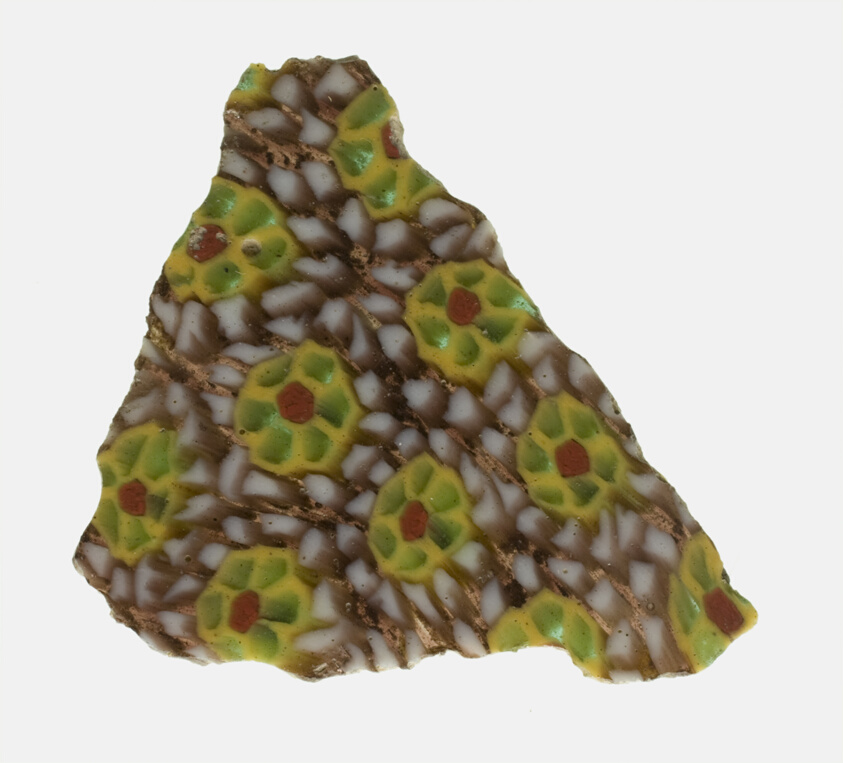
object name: Decorative Arts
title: Bowl Fragment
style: roman (ancient, style or period), ancient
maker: Roman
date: 1st century BCE-1st century CE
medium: Glass, mosaic glass technique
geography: Roman Empire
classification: fragment; bowl; decorative arts